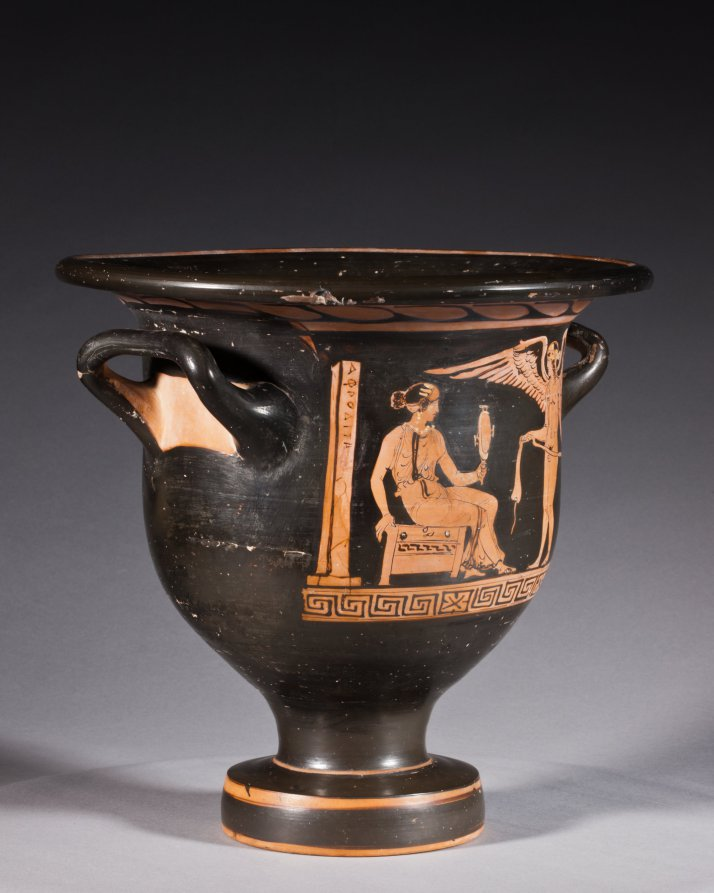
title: Red-Figure Bell Krater (Mixing Vessel): Aphrodite and Eros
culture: South Italian, Apulian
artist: attributed to Graz Painter (South Italian, Apulian, active c. 380–360 BCE)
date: c. 370–360 BCE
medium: ceramic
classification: Ceramic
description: This small mixing vessel shows a finely dressed woman seated on a chest and holding up a mirror to admire herself. Before her stands Eros, the winged god of love, holding a ribbon or sash. Behind the woman stands a pillar with the inscription ΑΦΡΟΔΙΤΗ, or APHRODITE, the goddess of love. Such labels are rare on vases, and scholars debate whether this names the woman shown as Aphrodite herself, with her son Eros, or a bride envisioning herself as Aphrodite, just before her wedding.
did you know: The dancing nude youths on the reverse are unusual; typically they would be standing and draped.